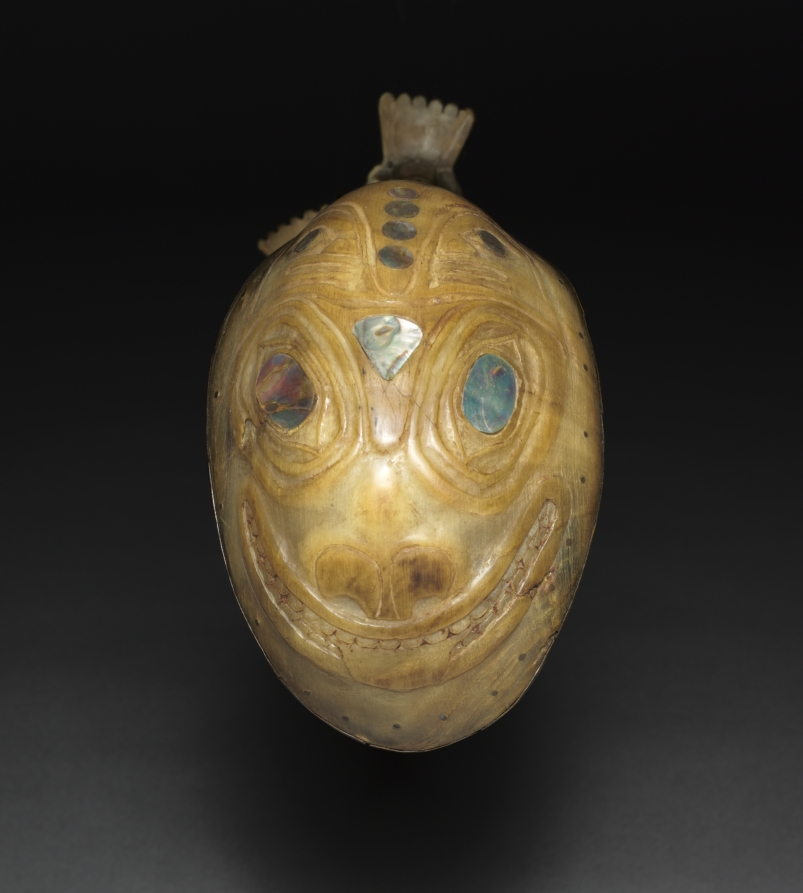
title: Feast Ladle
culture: Native North America, Northwest Coast, Alaska, Tlingit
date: late 1800s–early 1900s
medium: horn, bone, copper, abalone shell inlay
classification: Miscellaneous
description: Elaborate utensils, valuable possessions of Northwest Coast noble clans, were used during potlatch feasts. An imposing eagle hovers, patron-like, over this ladle’s bowl and the bounty it once served; a bear’s head appears on the underside of the bowl. Both may be crests, motifs that, like European heraldry, were exclusive to important families and referred to their histories and rights to control land and resources.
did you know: An imposing eagle presides over the bowl of this impressive ladle.